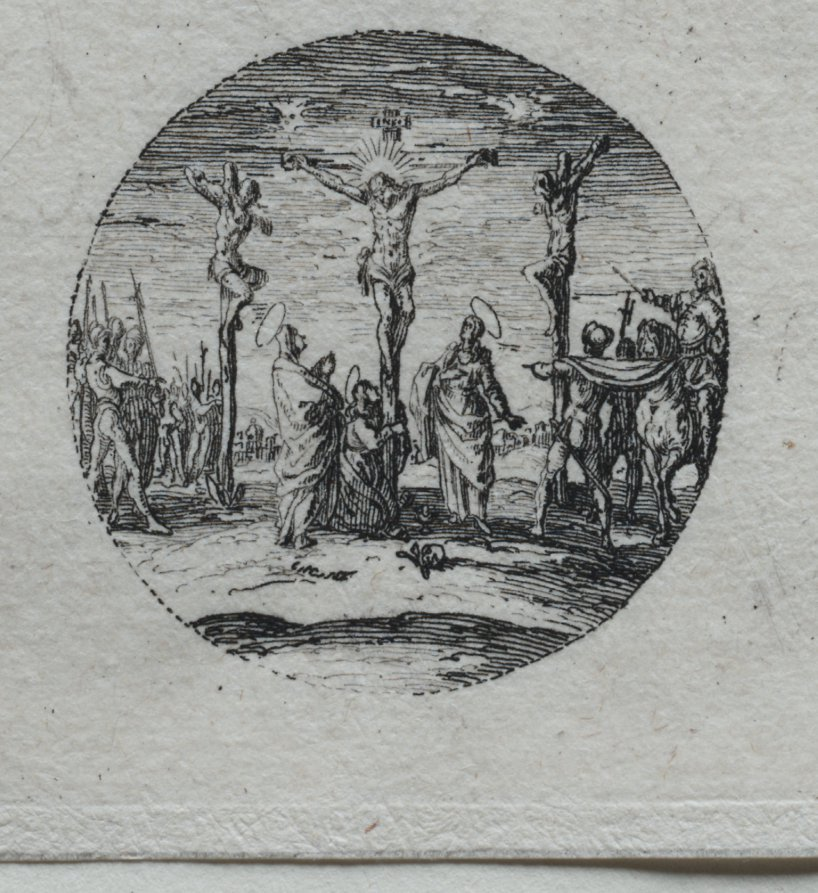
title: The Mysteries of the Passion: The Descent from the Cross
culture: France, 17th century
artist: Jacques Callot (French, 1592–1635)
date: 1631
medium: etching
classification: Print